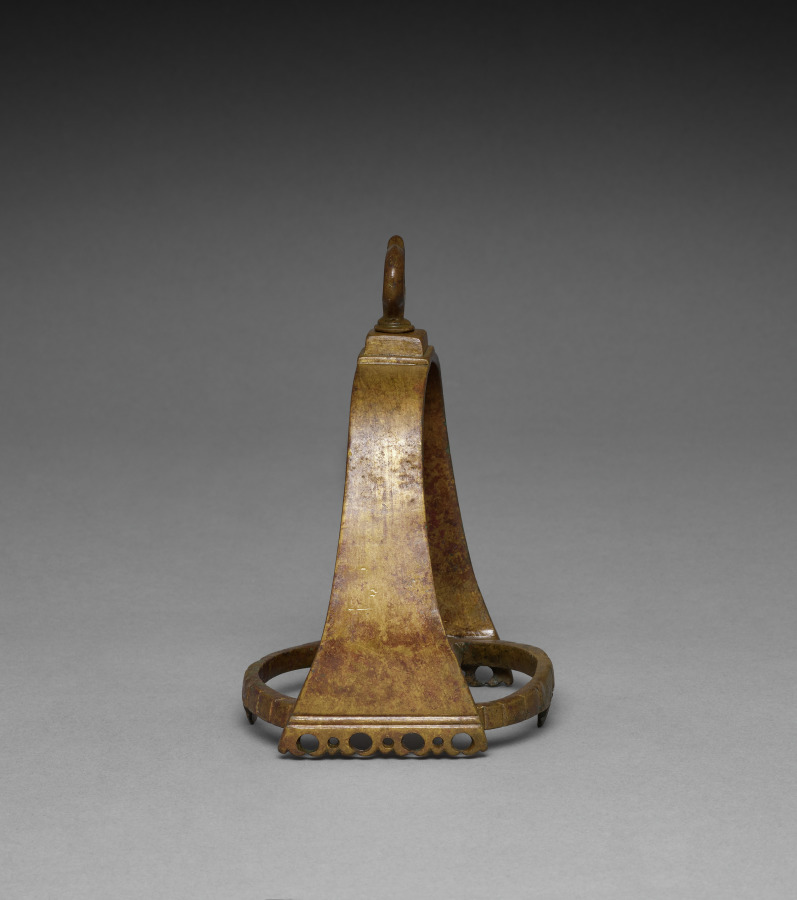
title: Stirrup (1 of 2)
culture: England (?), 17th century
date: 1600s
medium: brass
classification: Arms and Armor